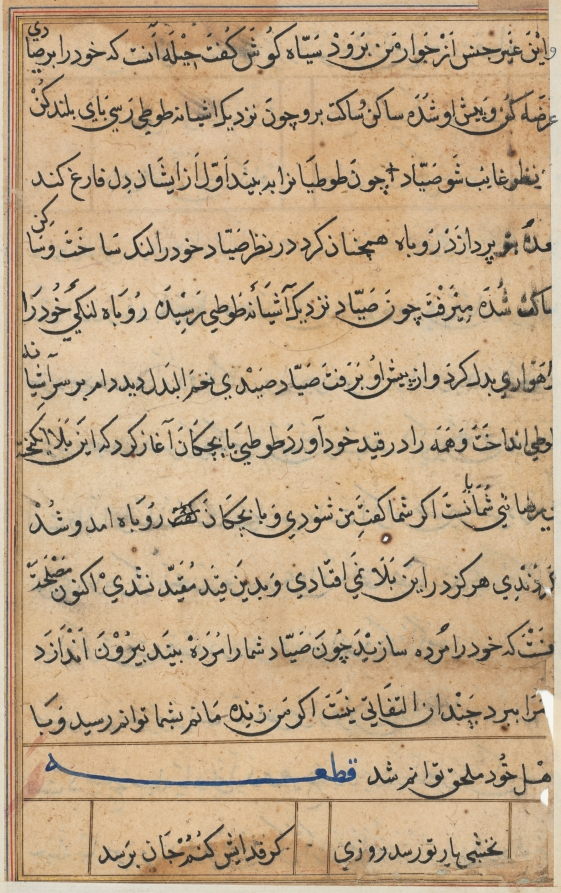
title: Page from Tales of a Parrot (Tuti-nama): text page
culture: Mughal India, court of Akbar (reigned 1556–1605)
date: c. 1560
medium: gum tempera, ink, and gold on paper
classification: Painting